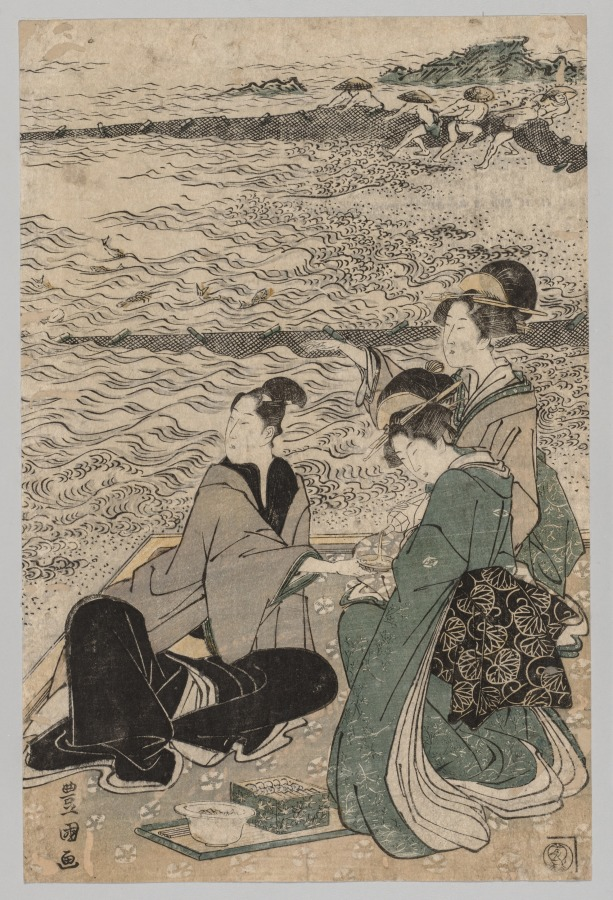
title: Man and Two Women at the Sea Shore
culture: Japan, Edo period (1615–1868)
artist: Utagawa Toyokuni (Japanese, 1769–1825)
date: 1769–1825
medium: color woodblock print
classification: Print